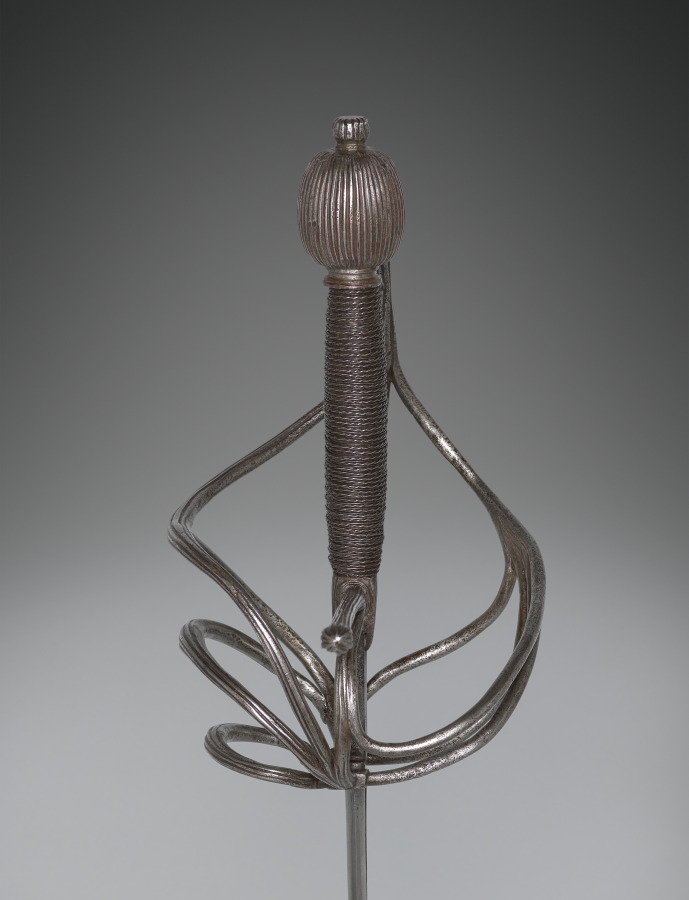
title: Rapier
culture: Blade: Spain, Toledo Hilt: Italt, Belluno?, late 16th-early 17th Century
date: c. 1580–1610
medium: steel, ribbed guard and pommel; wood and wire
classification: Arms and Armor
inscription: PIETRO HERNAN[DJEZ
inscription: three (Toledo and half-moon)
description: The rapier was a sword worn with civilian dress and used in duels. The term rapier derives from the 16th-century French word rapière, which in turn derived from the Spanish espada ropera, or “dress sword.” The rapier was a light weapon with a straight double-edged and pointed blade that, with the development of the art of fencing in the 1500s and 1600s, gradually became narrower and lighter, and thus suitable for thrusts only. With the new technique of swordplay emphasizing the point of the blade, sword guards became more complex to protect the duelist’s unarmored hand. These elaborate guards were frequently decorated by various techniques—chiseling, bluing, russeting, and damascening.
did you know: During this time fencing academies were already in existence in Milan, Venice, Verona, and Madrid, and the rules of fencing evolved with two styles dominating, the Spanish and the Italian.